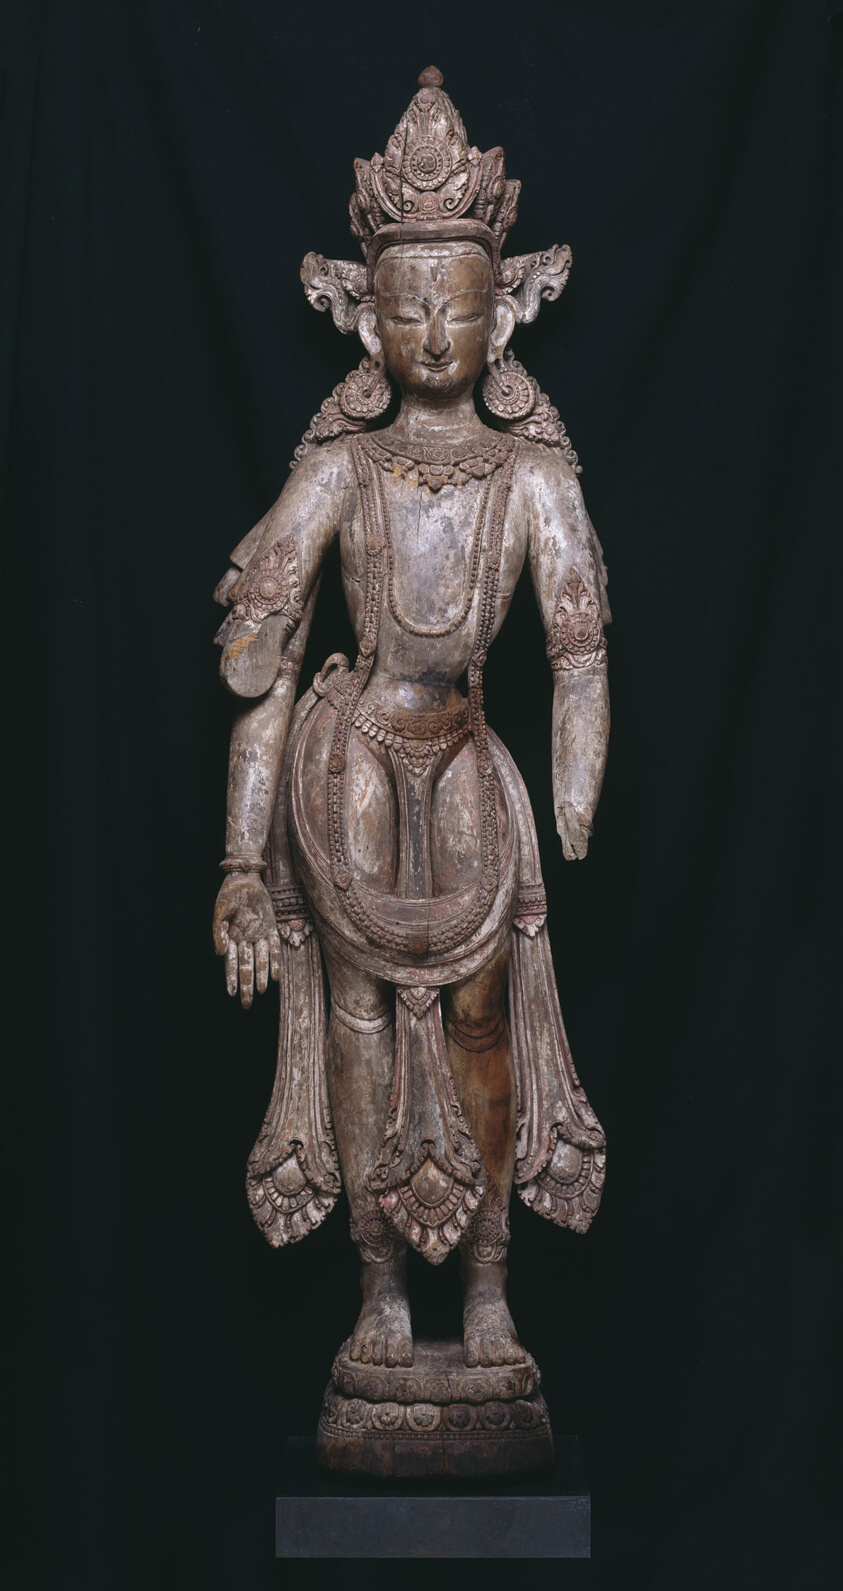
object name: Sculpture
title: Bodhisattva Amoghapasha Lokeshvara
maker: Nepal; Kathmandu Valley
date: 15th century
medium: Painted wood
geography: Kathmandu Valley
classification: wood; sculpture; asian art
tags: religion, bodhisattva, Buddhism